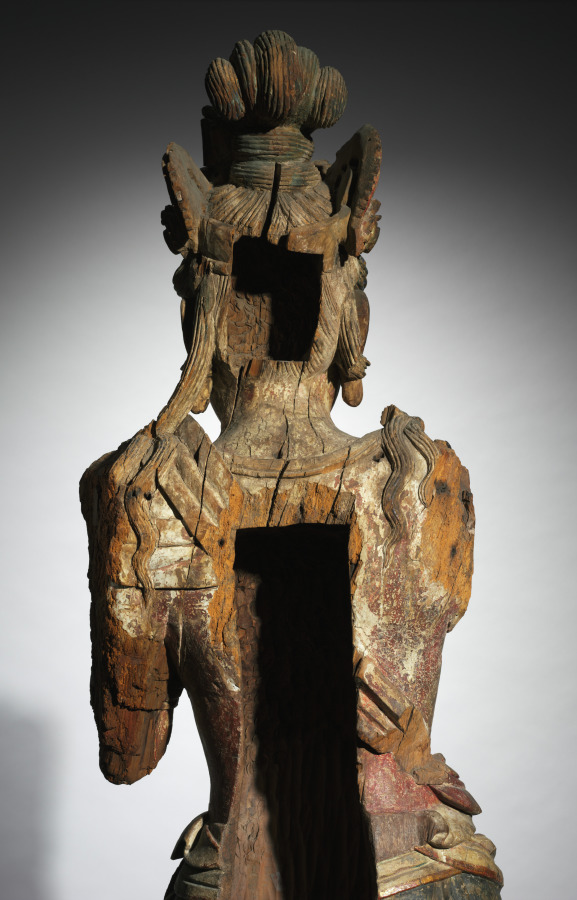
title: Eleven-Headed Guanyin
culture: China, late Northern Song dynasty (960-1127) - Jin dynasty (1115-1234)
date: 1100–1200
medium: wood with polychromy and cut gold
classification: Sculpture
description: The bodhisattva is an enlightened being dedicated to the spiritual awakening of all beings. The compassionate bodhisattva Guanyin, in a variety of manifestations, is probably the most popular deity of worship in Chinese Buddhism. In the Esoteric Buddhist form shown here, this standing Guanyin has a total of eleven heads, with smaller ones above the principal head. The uppermost head represents the Buddha Amitabha, to whom he is closely related. The eleven heads symbolize the Buddha’s steps on the path to enlightenment.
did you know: This Guanyin is carved from a single block of willow (genus Salix sp.).